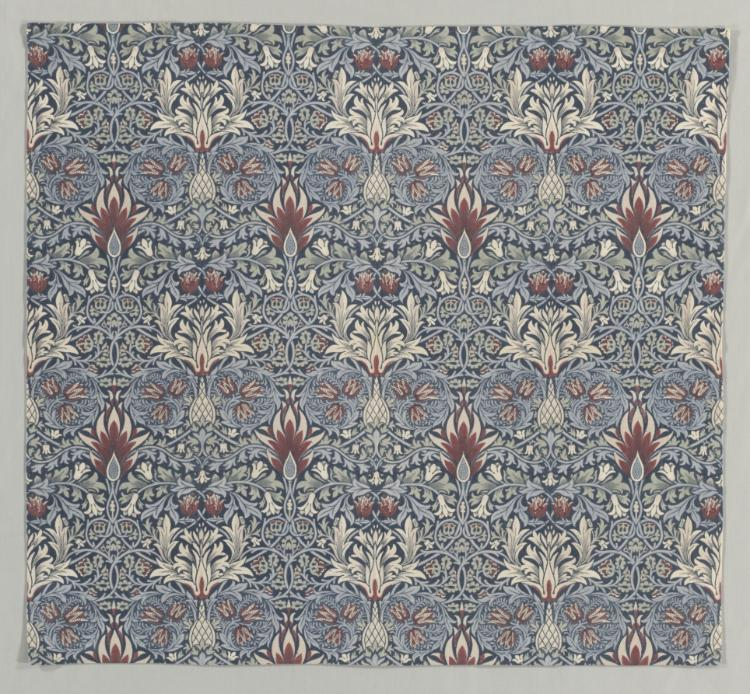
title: Snakeshead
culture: England, Walthamstow, Early 20th century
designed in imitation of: William Morris (British, 1834–1896)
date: Early 20th century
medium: plain weave cotton, printed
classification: Textile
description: When Morris designed Snakeshead in 1877, Indian silks were in style and widely imported from British India. This design stands out for its diminutive motifs and the strong red and black colors, which were fashionable only for a short time before paler hues regained favor with clients. While its color scheme suggests distant lands with warmer climates, the pattern showcases one of Morris’s favorite flowers: the fritillary, a wildflower that he remembered growing in the meadows near Oxford.